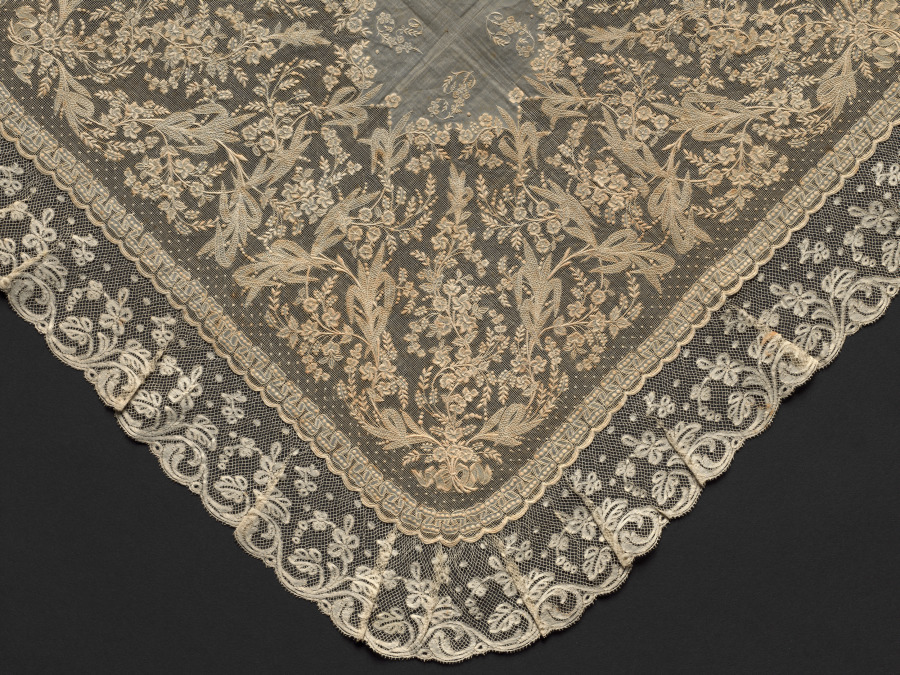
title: Lace Handkerchief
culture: France or Italy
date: 1800s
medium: plain weave linen center with needle lace (drawnwork) surround, bobbin lace (Valenciennes lace) edging, and embroidery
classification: Embroidery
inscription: "P. P. de Y."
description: In the center of this lace handkerchief, the initials P P de Y are embroidered in white.